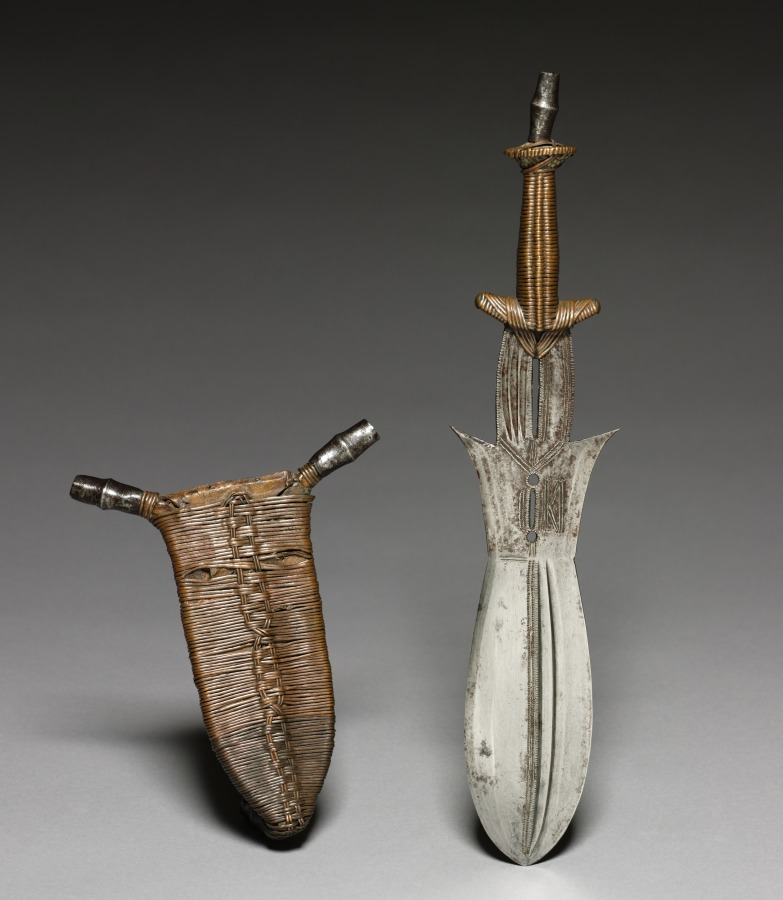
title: Knife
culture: Africa, Central Africa, Democratic Republic of the Congo, Ngbandi-style maker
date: c. 1900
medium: Iron, copper alloy, and rawhide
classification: Arms and Armor